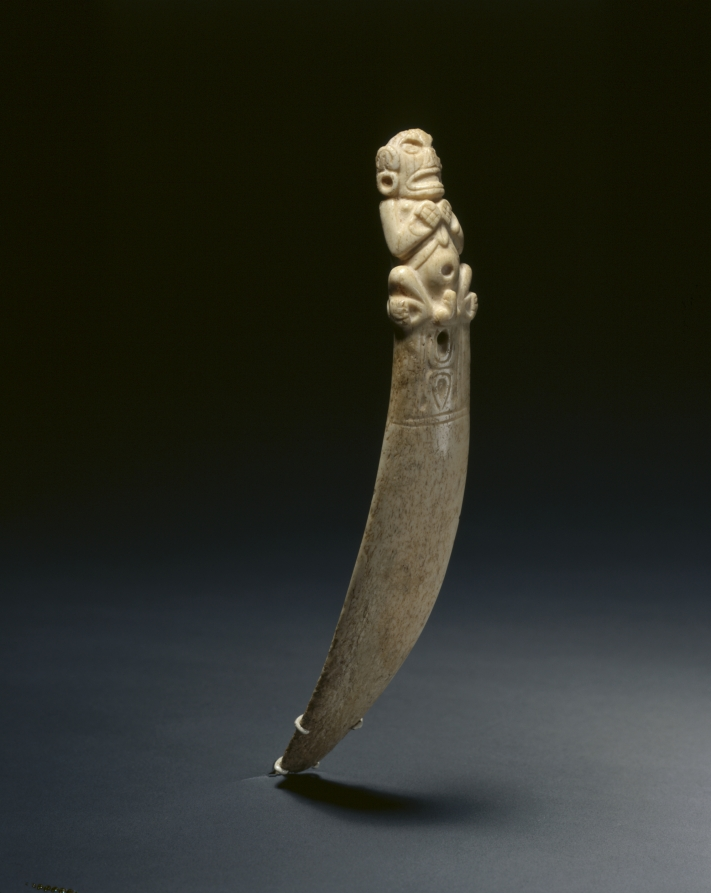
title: Spatula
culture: Caribbean, Greater Antilles, Taino, 10th-15th century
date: 900–1492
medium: manatee bone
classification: Sculpture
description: In 1492, when Christopher Columbus sailed into the Caribbean, the islands of Cuba, Hispaniola (Haiti and the Dominican Republic), Jamaica and Puerto Rico were inhabited by the Taino people. Taino religious ceremonies often included the snuffing of hallucinogenic herbs to alter the consciousness and facilitate contact with the spirit world. Carved spatulas were used to blend the powdered herbs. After purifying the body through purging the stomach, the snuff was inhaled into both nostrils.